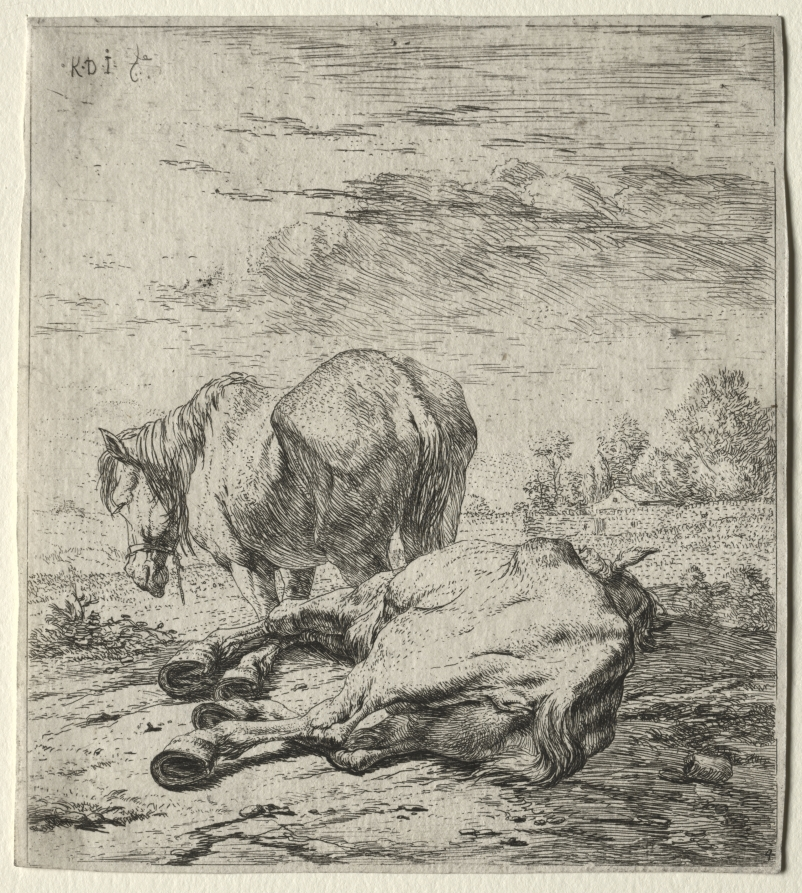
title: The Two Horses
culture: France, 17th century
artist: Karel Dujardin (Dutch, c. 1622–1678)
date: 1652–60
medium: etching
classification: Print